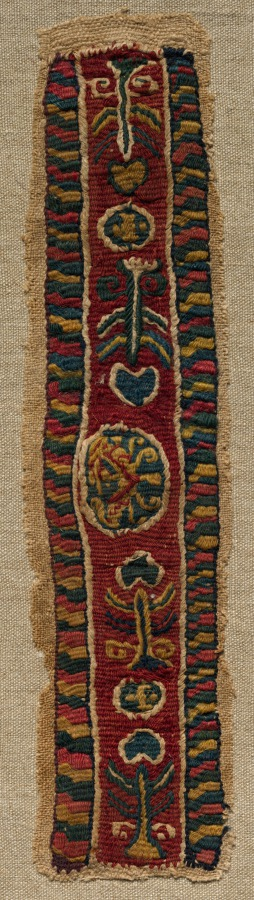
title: Fragment with an Ornamental Band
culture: Egypt, Abbasid period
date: mid 700s - mid 800s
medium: tabby weave with inwoven tapestry ornament, linen and wool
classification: Textile